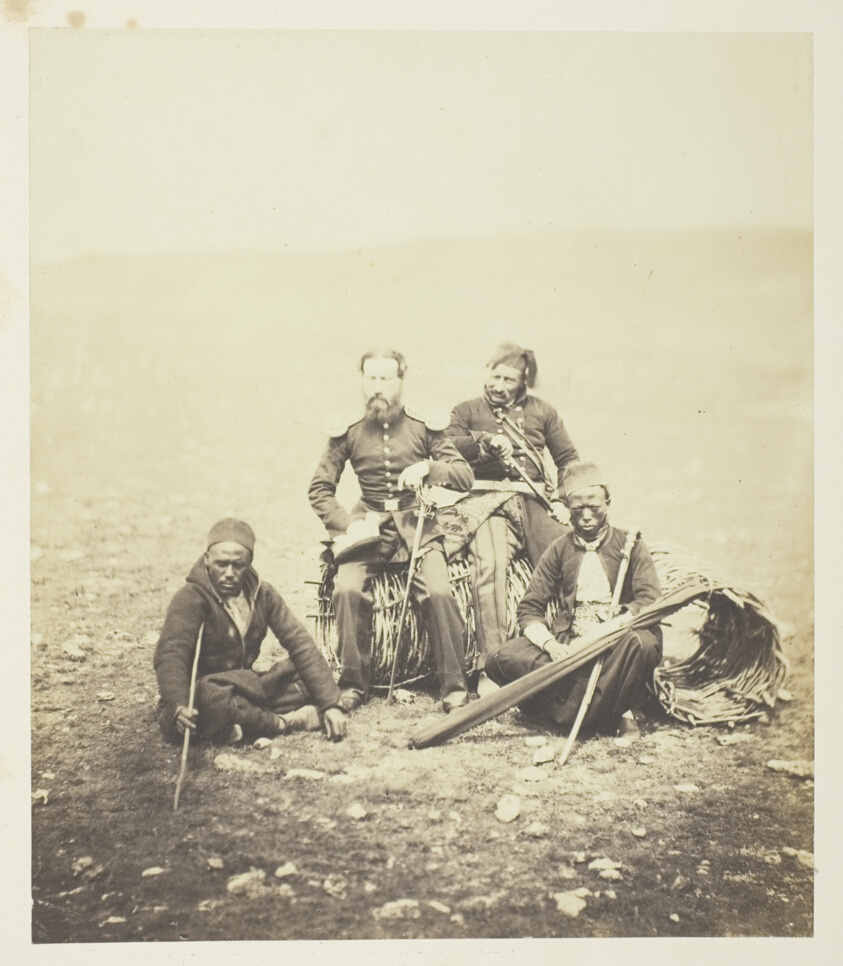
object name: Photograph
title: Untitled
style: 19th century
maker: Roger Fenton (English, 1819–1869)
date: 1855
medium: Salted paper print, plate 50 from the album "Photographs Taken in the Crimea" (1856)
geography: England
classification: salted paper print; photographic process; photography; photograph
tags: Collected by Hugh Edwards, Crimea 1856